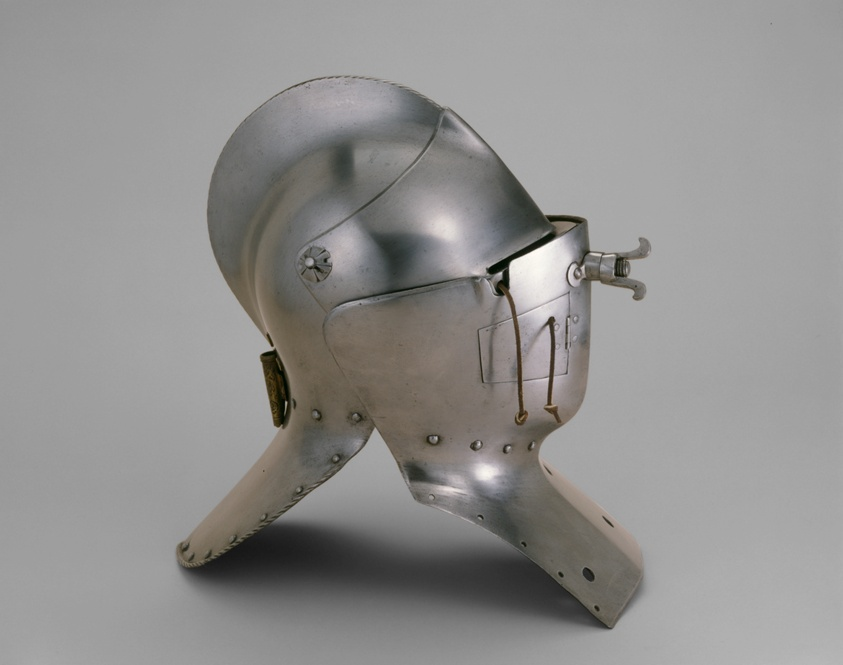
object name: Armor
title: Tournament Sallet (Rennhut) with Buffe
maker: German, Saxony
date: c. 1570/1600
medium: Steel, iron, brass, and leather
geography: Saxony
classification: suit-helmet; armor; arms and armor